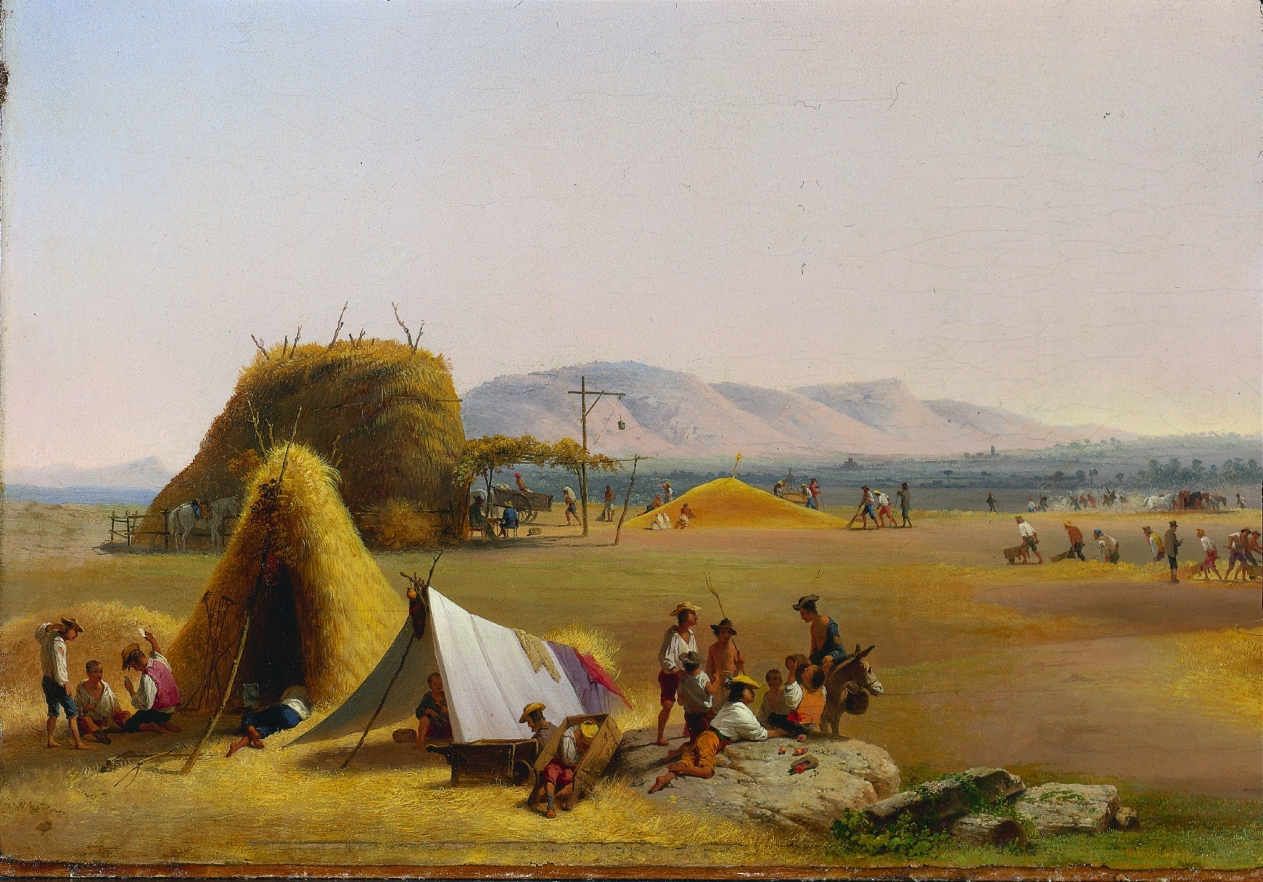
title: Harvest on the Roman Campagna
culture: America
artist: John Gadsby Chapman (American, 1808–1889)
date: 1868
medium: oil on canvas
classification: Painting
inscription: signed on the back: HARVEST ON THE ROMAN CAMPAGNA / FOR H. B. HURLBUT, ESQ. CLEVELAND, O. / BY John G. Chapman / Rome 1868